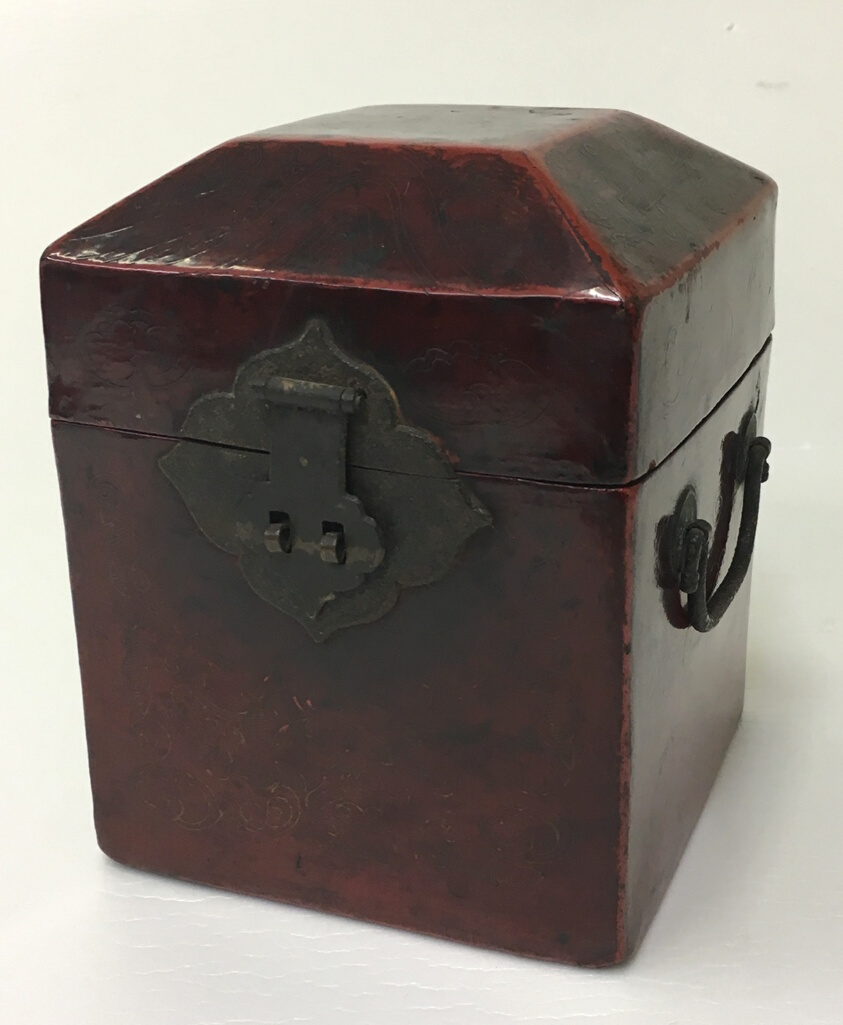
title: Red Lacquer Box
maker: Korea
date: Joseon Dynasty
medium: lacquered and decorated leather, brass ring handles and hasp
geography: Korea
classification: lacquerware; asian art